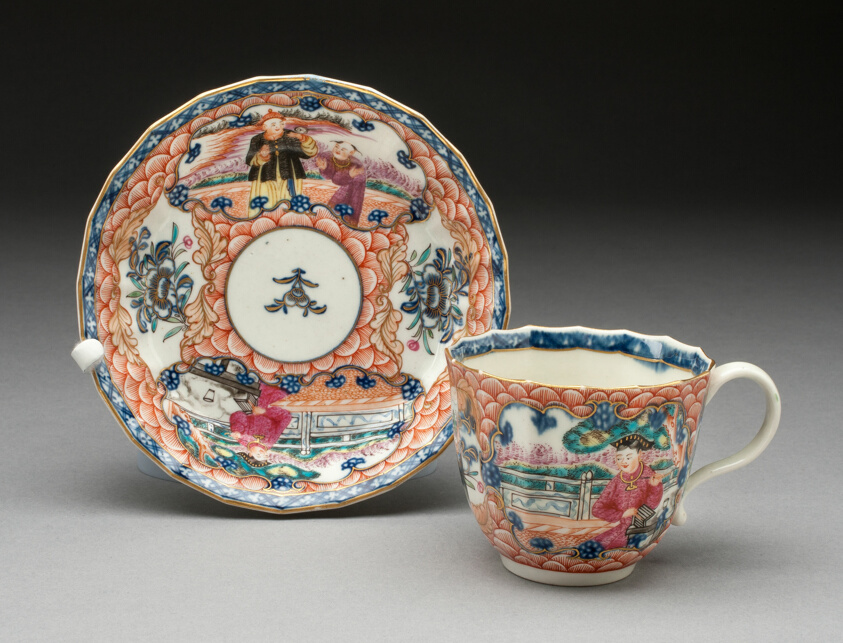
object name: Ceramics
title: Coffee Cup and Saucer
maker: Worcester Porcelain Factory (Warmstry House Period, 1751–1783); Worcester, England, founded 1751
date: c. 1765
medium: Soft-paste porcelain, polychrome enamels and gilding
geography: Worcester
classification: drinking vessel; teaware; ceramics; porcelain; european decorative arts